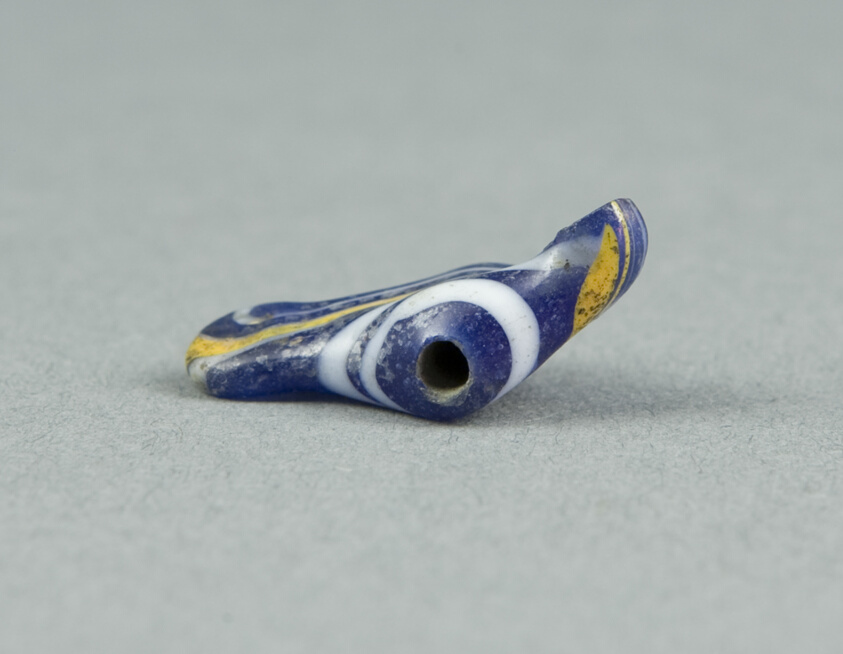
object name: Costume and Accessories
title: Bead or Amulet in the Form of a Bird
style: new kingdom, egyptian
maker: Egyptian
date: New Kingdom, Dynasty 18–19 (about 1550–1186 BCE)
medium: Glass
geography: Egypt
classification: bead; jewelry; amulet; ancient art; costume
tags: birds, animals